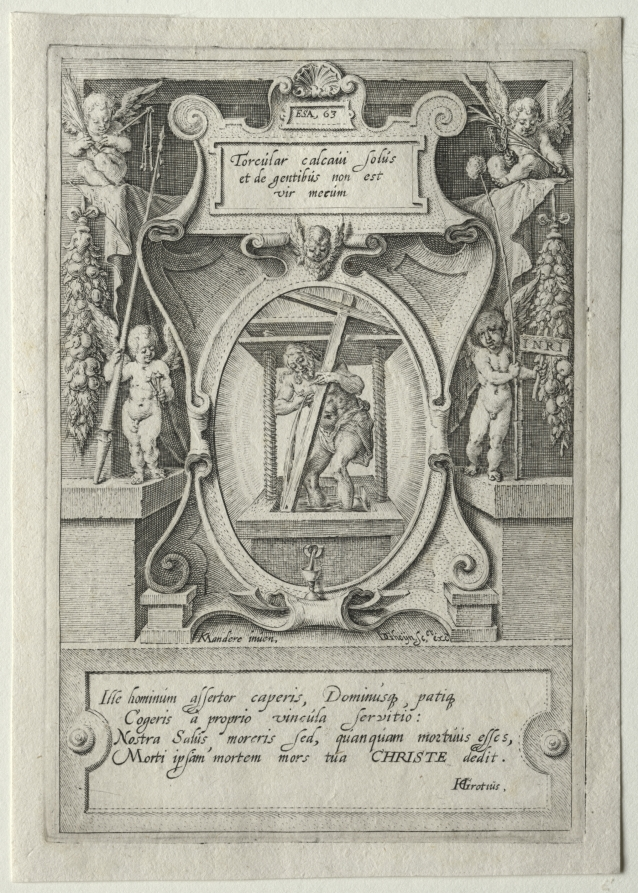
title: Passion Set: Title Page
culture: Netherlands, 16th century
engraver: Jacob de Gheyn II (Netherlandish, 1565–1629)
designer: after Karel van Mander I (Dutch, 1548-1606)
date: 1596–98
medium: engraving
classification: Print